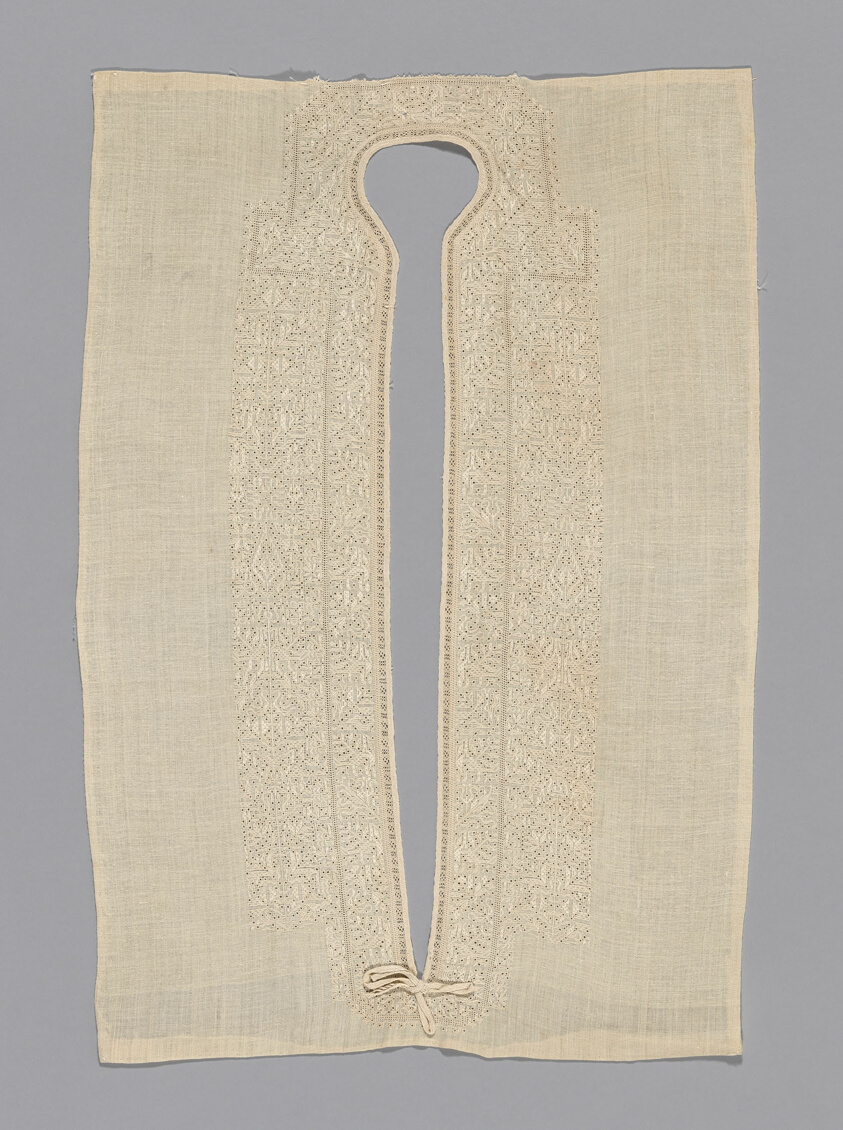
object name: Textile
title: Neck Insert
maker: Greece, Ionian Islands, Leukas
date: 18th century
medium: Linen, plain weave; embroidered in eyelet hole, hem, Italian hem, and satin stitches; edged with linen, needle lace twill oblique interlacing tape and ties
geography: Levkás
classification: textile; needlework (visual works)